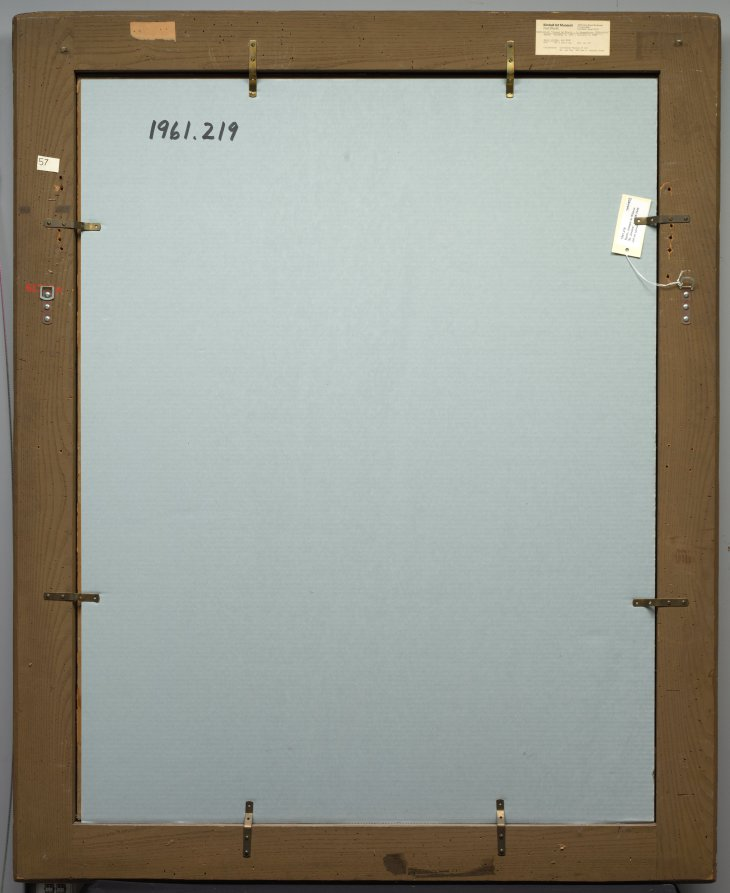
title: Saint Jerome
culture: Spain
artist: Jusepe de Ribera (Spanish, 1591–1652)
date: c. 1638–40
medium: oil on canvas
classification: Painting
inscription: Signed lower right: "Jusepe de Ribera espa[ñol]. F."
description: Saint Jerome (about ad 347–420) translated biblical texts into Latin. Although he sometimes appears as a scholar in his study, Ribera represents him here as a penitent who withdrew to the desert, beating his chest with a stone to emulate Christ’s suffering and contemplating a skull symbolizing human vanity. Working in Naples, Ribera enthusiastically adapted Caravaggio’s characteristic use of light and dark and naturalistic models.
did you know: Ribera signed the painting on the spine of the book in which Jerome will write.